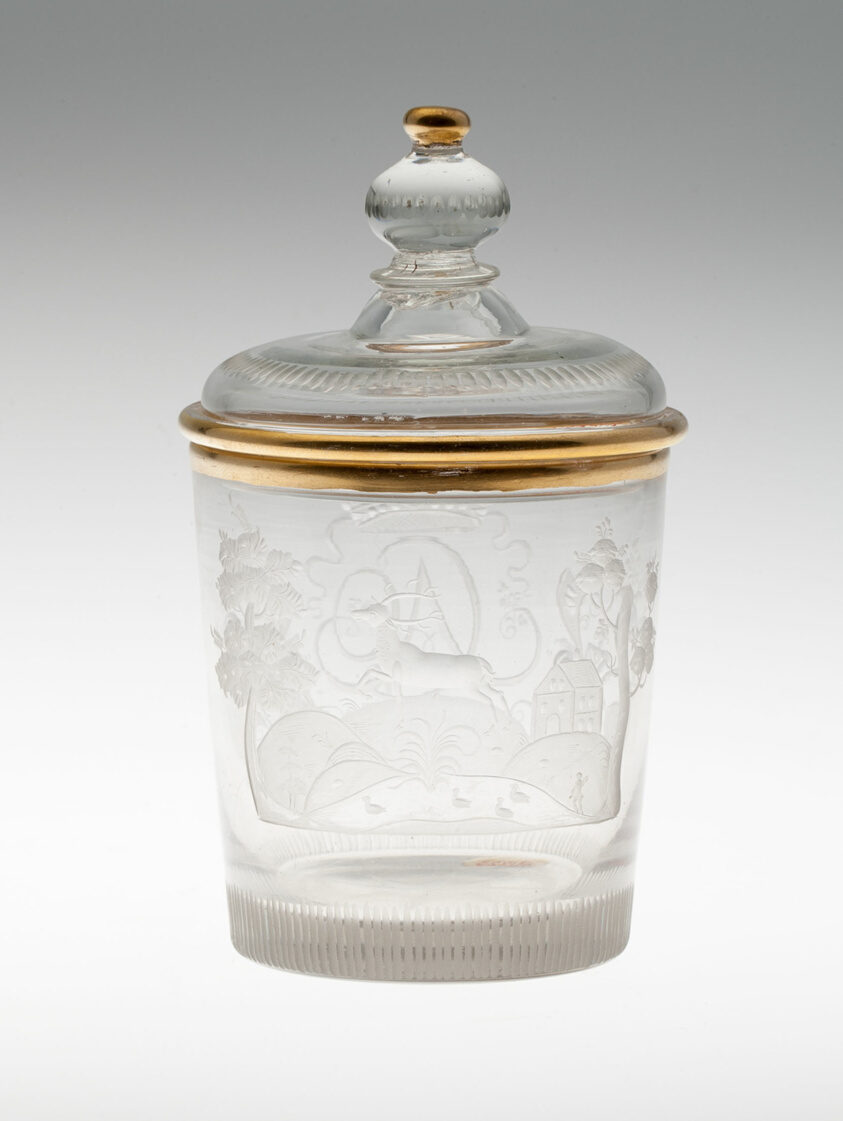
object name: Glass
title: Beaker and Cover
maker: Germany, Zechlin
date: c. 1750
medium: Glass; engraved and gilt decoration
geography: Flecken Zechlin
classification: drinking vessel; glass; european decorative arts